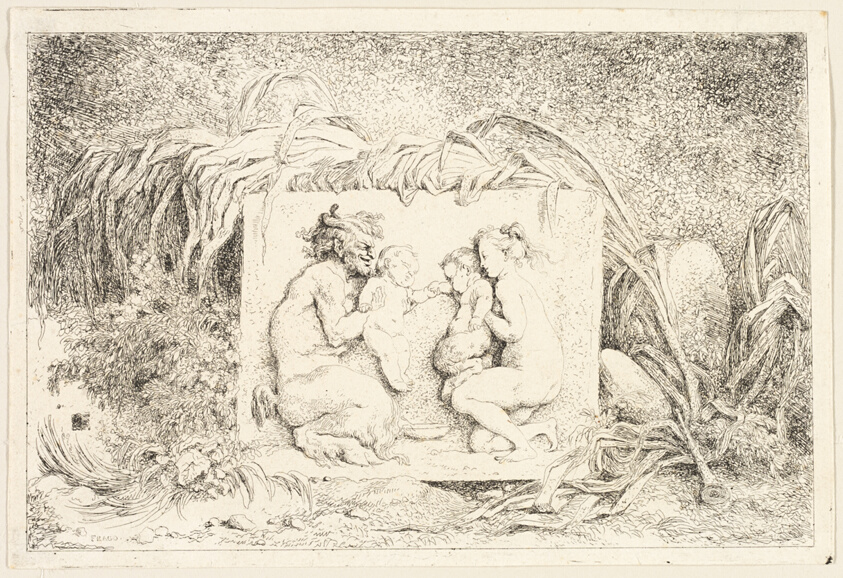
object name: Print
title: Satyr's Family from Bacchanales, or Satyr's Games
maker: Jean-Honoré Fragonard; French, 1732-1806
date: 1763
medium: Etching on ivory laid paper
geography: France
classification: etching; print; prints and drawing